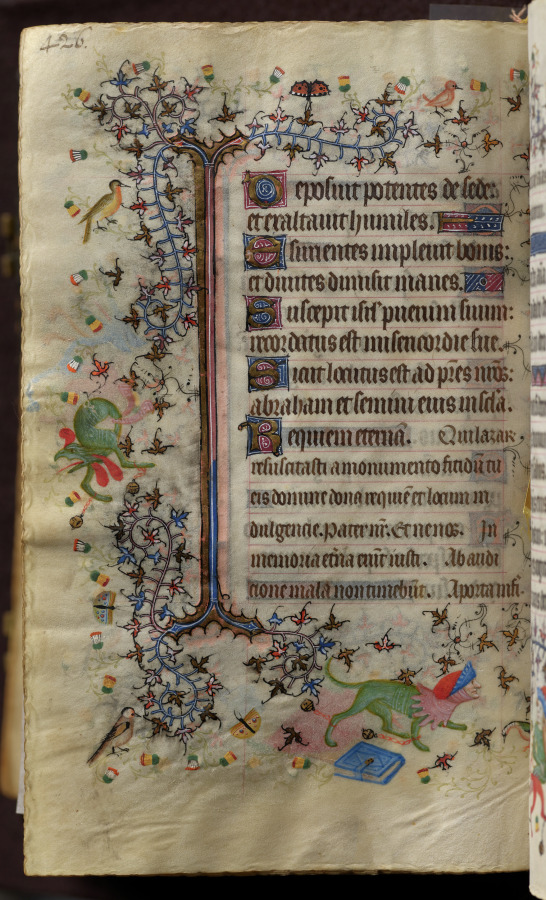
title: Hours of Charles the Noble, King of Navarre (1361-1425): fol. 207v, Text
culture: France, Paris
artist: Master of the Brussels Initials and Associates (French)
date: c. 1405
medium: ink, tempera, and gold on vellum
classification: Bound Volume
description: This precious volume was obviously highly prized by its owner, the French-born King of Navarre, who had his coat of arms painted on no less than twenty folios. Rather than directly commissioning this manuscript from a specific workshop, it seems that Charles the Noble acquired his book of hours -- perhaps ready-made for the luxury market -- while on a trip to Paris in 1404-05. A collaborative effort, six painting styles are evidenced within the pages of this codex, those of two Italians, two Frenchmen, and two Netherlanders. The painter who was responsible for the planning and decoration of the book, and who produced seventeen of the large miniatures, was a Bolognese artist known as the Master of the Brussels Initials. His principal assistant, responsible for most of the borders, was a Florentine who signed his name "Zecho" da Firenze on folio 208 verso.